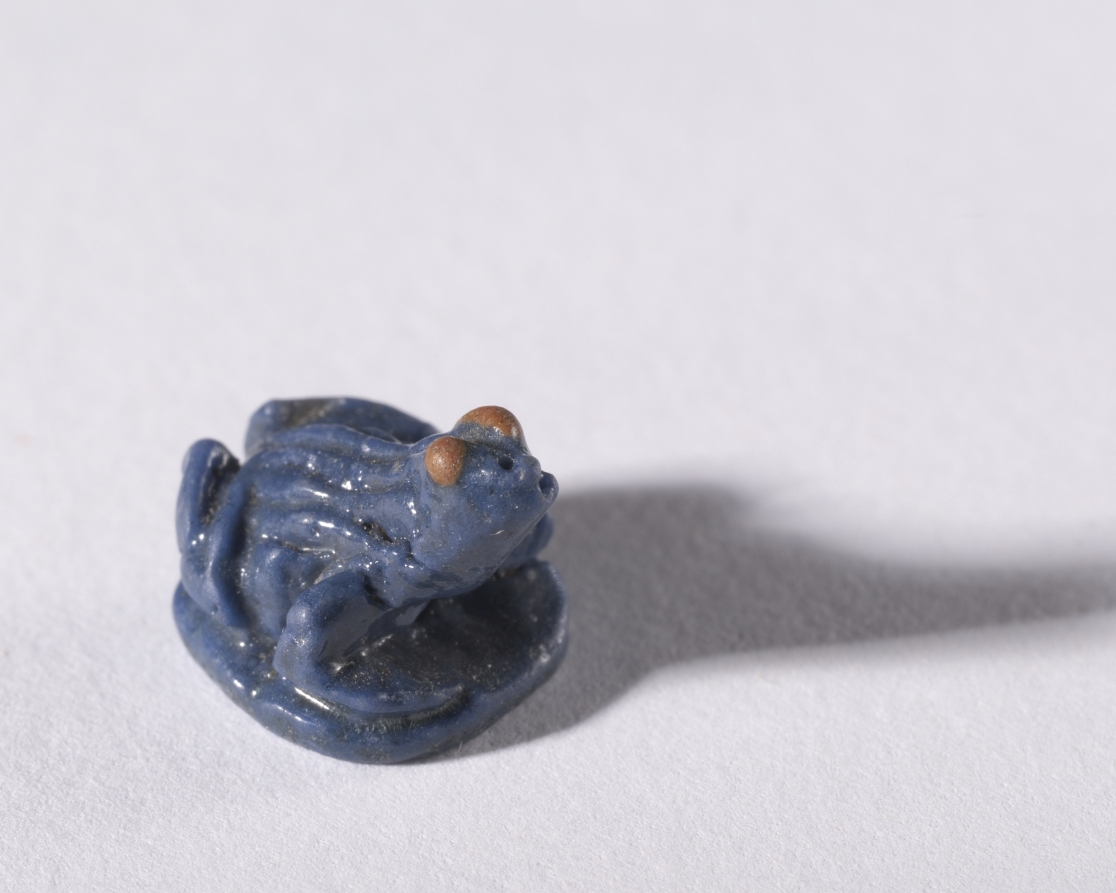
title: Frog Amulet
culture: Egypt, New Kingdom (1540–1069 BCE), Dynasty 18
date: c. 1380–1330 BCE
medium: polychrome faience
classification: Amulets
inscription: Inscribed "Nefer" (beautiful)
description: The frog, because of its numerous offspring, was a symbol of fertility. In fact, the hieroglyphic sign for 100,000 was a tadpole. Frog amulets were very popular both in semiprecious stone and in faience, and were worn by women hoping for an easy delivery. Both sexes wore the frog in expectation of a successful rebirth in the afterlife.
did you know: This frog amulet was made from faience, a fine type of self-glazing ceramic that is characteristically turquoise blue. It is a representation of Heqet, the frog goddess associated with childbirth and fertility.